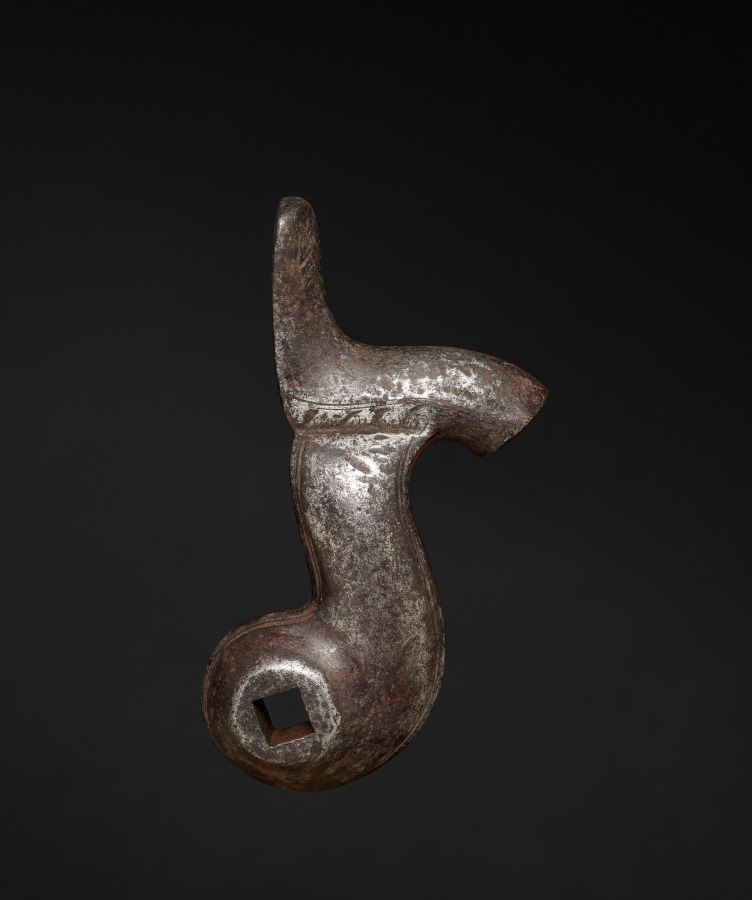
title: Gun-Lock Hammer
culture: England, early 19th century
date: c. 1800–1825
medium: steel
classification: Arms and Armor